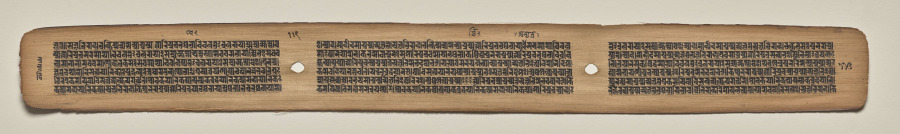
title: Text, Folio 112 (verso), from a Manuscript of the Perfection of Wisdom in Eight Thousand Lines (Ashtasahasrika Prajnaparamita-sutra)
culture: Eastern India, Bihar, Vikramashila Monastery. Painting: Nepal, Kathmandu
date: Sunday, September 14, 1119 (year 239 of the Newar Samvat in the month of Ashvina)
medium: gum tempera and ink on palm leaves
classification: Painting